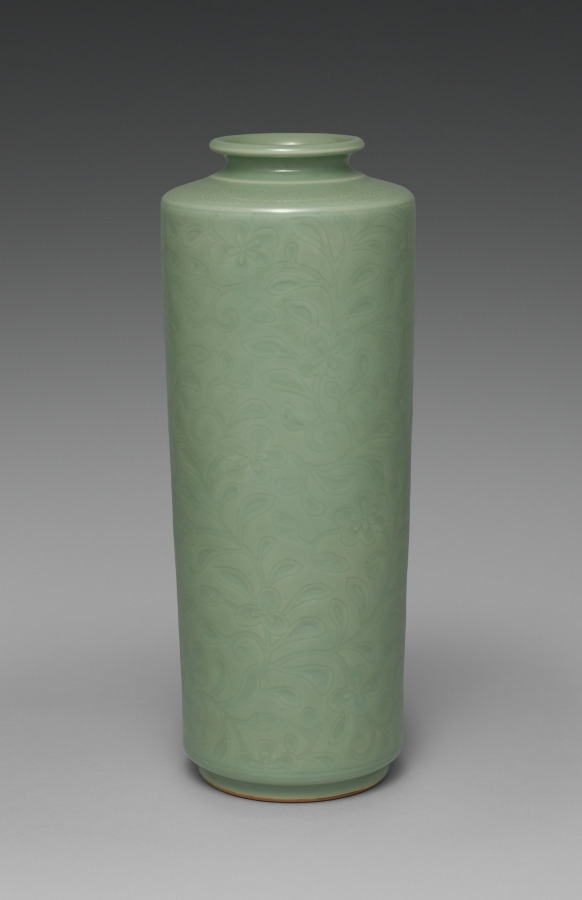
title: Tong-Shaped Vase with Flowers and Grasses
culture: Japan, Taishō period (1912–26) or Shōwa period (1926–89)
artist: Seifū Yohei IV (Japanese, 1872–1951)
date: 1914–46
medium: Porcelain with molded and carved design and green glaze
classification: Ceramic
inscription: 清風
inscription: 彫画 / 青磁花瓶 / 清風造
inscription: 青磁花瓶 / 彫画 【印】清風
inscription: 清風造 【印】成山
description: Many of the vases created by Yohei III and IV were made with reference to and in emulation of Chinese ceramics in both form and glazing. The vessel type called tongping, pronounced tōbin in Japanese, is tall and cylindrical, like the thick length of bamboo referenced in the shape of the ideograph tong 筒. Unlike the ancient gu, hu, and guan, this form did not emerge in China until the Ming dynasty, and many such vases date to the early Qing dynasty. Two green-glazed vases, CMA 2022.225 by Yohei III and this one by Yohei IV, are interpretations of this form. Yohei III’s version has slightly hunched shoulders and is somewhat wider at the top below the small neck and lip. Yohei IV’s vase is more angular. The wide rack of molded cloud encircling the Yohei III vase rises subtly from very low relief banding above and below it, accentuating the vessel’s rounded edges and complementing the form. In contrast, the allover flower vine pattern on the body and “seven treasures” pattern at the collar of the vase by Yohei IV evokes a garment’s cuffed sleeve, like the common English appellation for this type of vessel—“sleeve vase.”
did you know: Seifū Yohei IV continued to create works in the studio’s signature colors but also produced pieces with strong color and flare that were his interpretations of Qing dynasty (1644–1911) glazes.